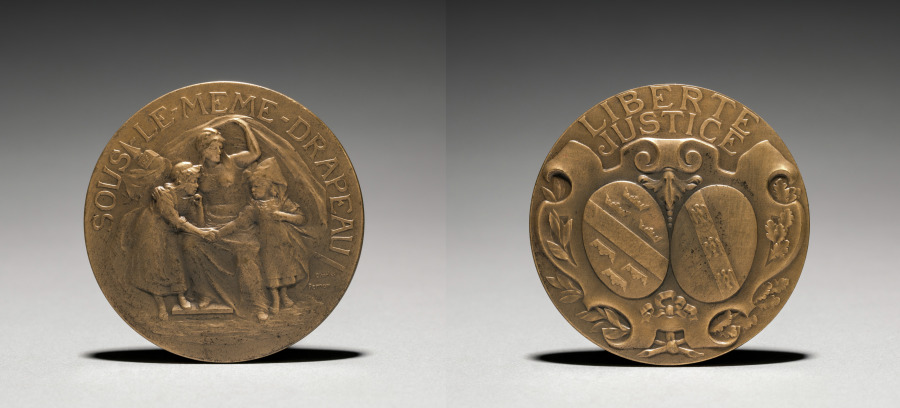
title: Medallion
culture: France, 19th-20th century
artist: Charles-Theodore Perron (French, 1862–1934)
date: ca. 1918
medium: bronze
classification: Metalwork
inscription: "SOUS LE MEME DRAPEAU" (Under the Same Flag); signed: "Charles Perron."